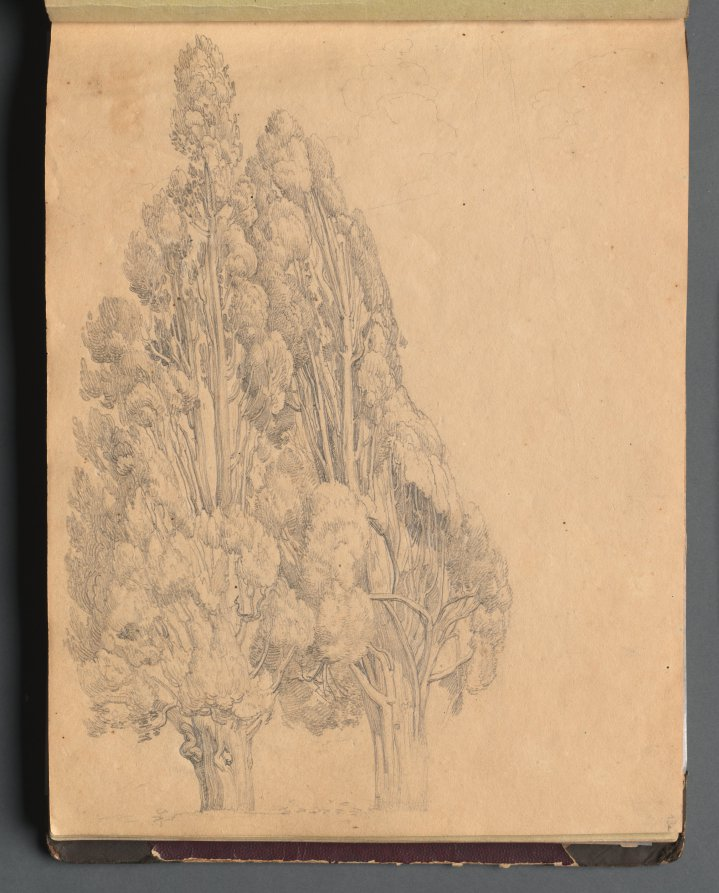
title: Album with Views of Rome and Surroundings, Landscape Studies, page 13a: Trees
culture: Germany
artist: Franz Johann Heinrich Nadorp (German, 1794–1876)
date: c. 1830s-70s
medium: graphite on brown paper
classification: Bound Volume